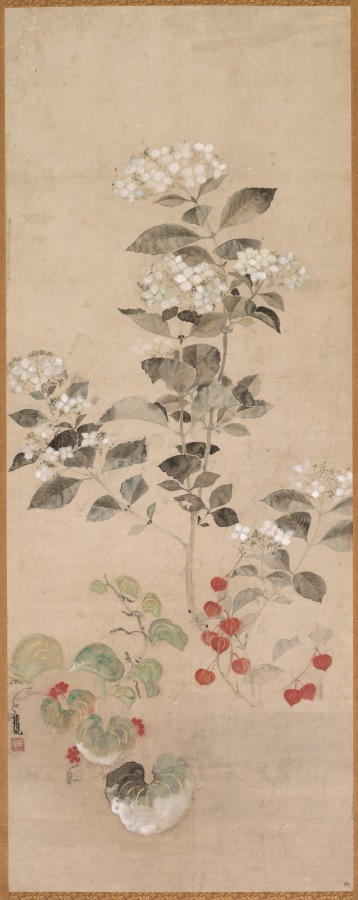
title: Summer Flowers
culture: Japan, Edo period (1615–1868)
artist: Kitagawa Sōsetsu (Japanese, active 1639–50)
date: mid-1600s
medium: hanging scroll; ink, color, and gold on paper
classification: Painting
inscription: 法橋相説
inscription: Seal: 印年 (Inen)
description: White hydrangea, orange-colored demon’s lantern, and greenbrier vine appear together in this scroll. The artist used the dripping-in (tarashikomi) technique to create a sense of depth and dimension in the leaves of the plants. A carefully controlled brush loaded with a high ratio of water to ink or color is key to the success of this brush method. Gold lines indicate the veins of leaves and the seams of pods.